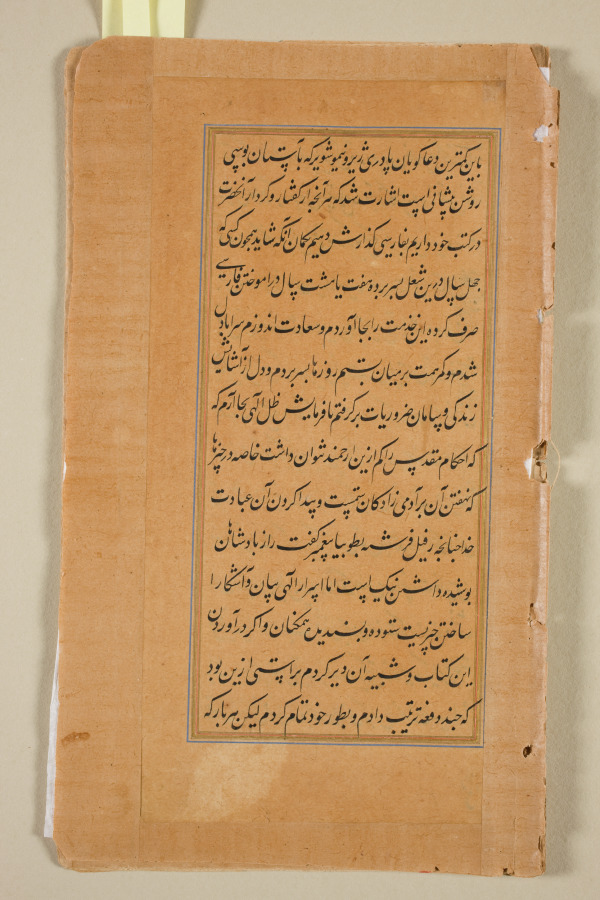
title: Text, Folio 4 (recto), from a Mirror of Holiness (Mir’at al-quds) of Father Jerome Xavier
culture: Mughal India, Allahabad, made for Prince Salim (1569–1627)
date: 1602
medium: Ink and gold on paper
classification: Manuscript